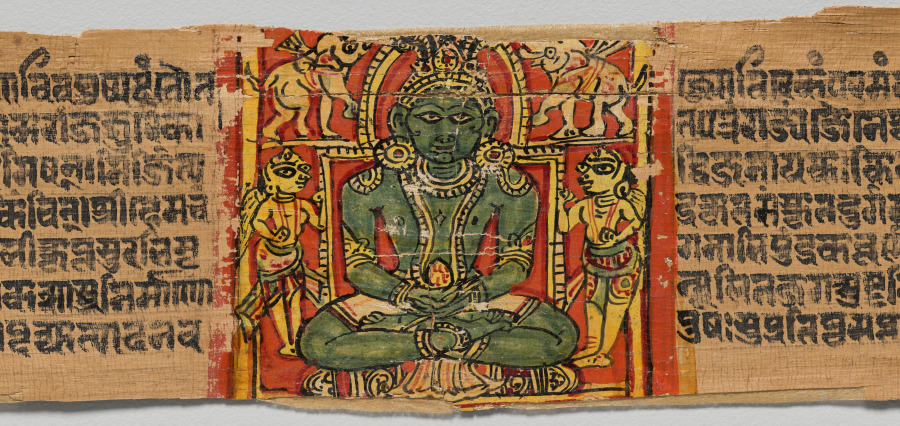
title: Folio 1, from a Great Poem about Twos (Dvyashraya Mahakavya) of Hemachandra with Commentary by Abhayatilaka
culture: Western India, Gujarat, possibly Patan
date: 1428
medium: Gum tempera and ink on palm leaf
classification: Painting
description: The first two folios of this manuscript commentary have adjoining paintings: the first is the green image of Parshva, a liberated being known as a Jina, and the second depicts the author of the text, Hemachandra (1088–1173), as a monk with his royal patron Kumarapala (reigned 1143–1172). The text of this manuscript illustrates grammatical points of both Sanskrit and Prakrit—a living language derived from Sanskrit—with examples of the wondrous deeds of his kings.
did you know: Hemachandra was a celebrated poet, historian, grammarian, philosopher, and theologian of medieval India.